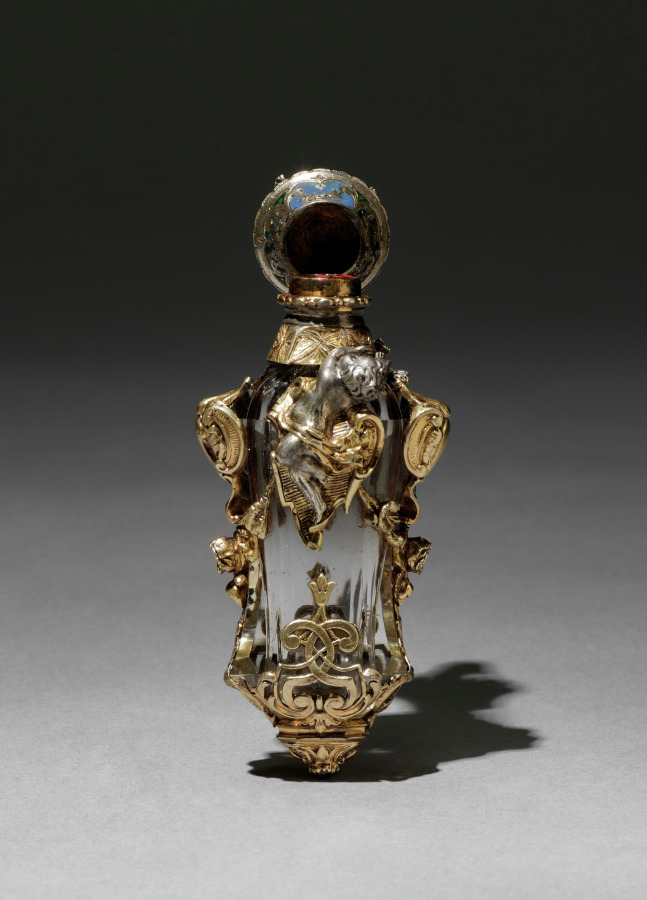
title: Scent Bottle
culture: France, 19th century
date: 1850–1870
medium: glass with enameled silver mounts, partially gilt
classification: Miscellaneous